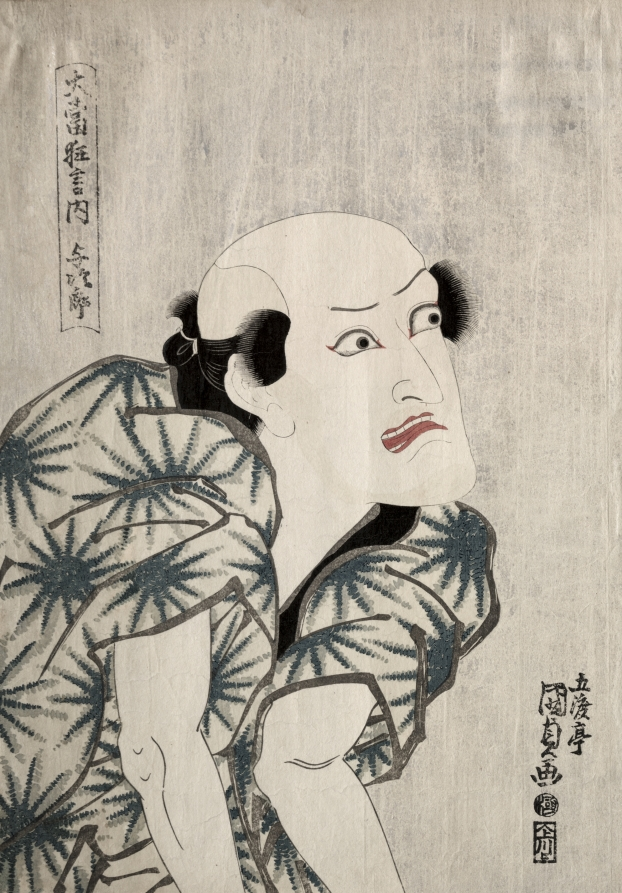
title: Nakamura Utaemon III as the Monkey Trainer Yojiro (from the series Famous Kabuki Plays)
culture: Japan, Edo period (1615–1868)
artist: Utagawa Kunisada (Japanese, 1786–1865)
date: mid-1810s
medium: color woodblock print, with mica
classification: Print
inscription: Signature: Gototei Kunisada ga. Publisher: Kawaguchi Uhei (Kawaguchi, emblem). Censorship Seal: kiwame.